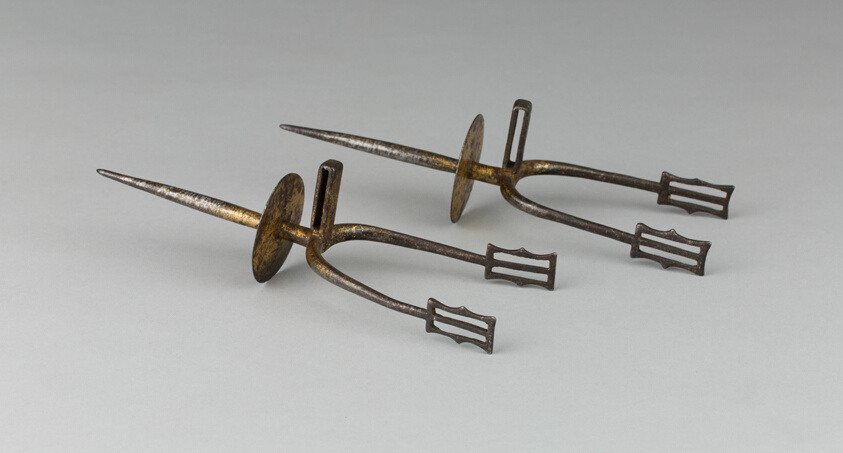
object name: Armor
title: Pair of Prick Spurs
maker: Northern African, Algeria or Morocco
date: 18th/19th century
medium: Gilded iron or steel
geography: Algeria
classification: horse equipment; armor; arms and armor